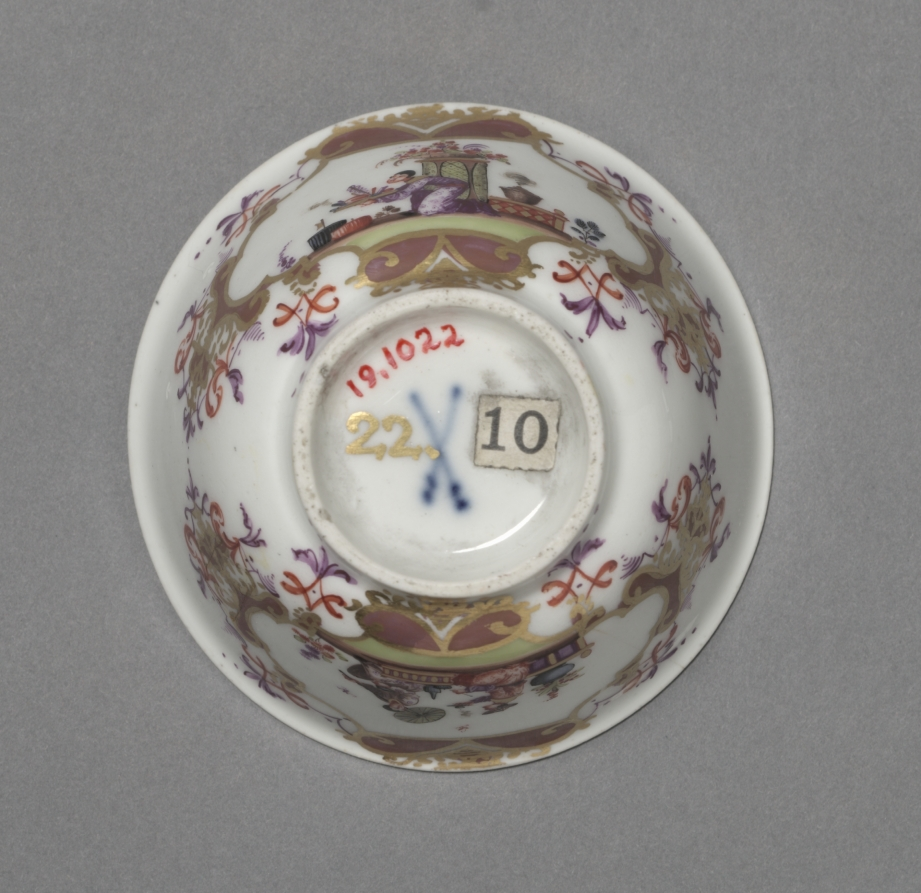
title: Cup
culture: Germany, Meissen, 18th century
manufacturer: Meissen Porcelain Factory (German, est. c. 1710)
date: c. 1725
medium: porcelain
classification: Ceramic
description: About 1725, Herold introduced a new variant of his "chinoiserie" decoration, in which small, full-length figures were depicted against cloudless skies, represented by the now brilliantly white porcelain, within foliate borders of gilt and enamel. This configuration became the standard formula for Meissen figural decoration for the next twenty years, although European subjects came to be depicted with greater frequency toward the middle of the century.